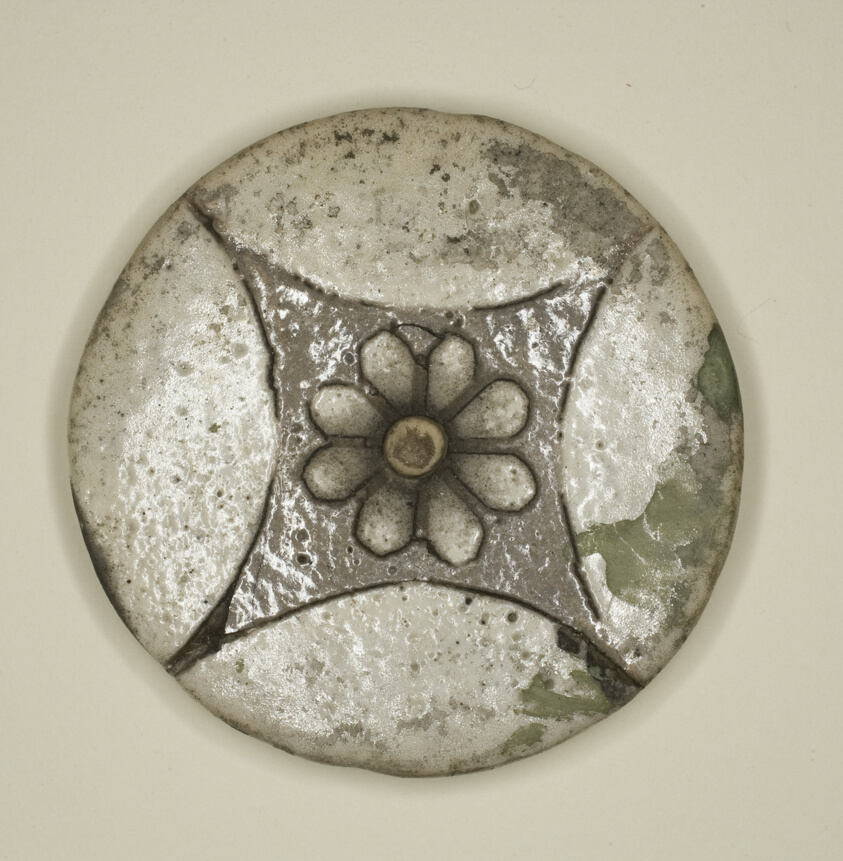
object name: Decorative Arts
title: Rosette from the Temple of Ramesses III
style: new kingdom, egyptian, ancient, ramesside period, twentieth dynasty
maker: Egyptian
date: New Kingdom, Dynasty 20 (about 1186–1069 BCE)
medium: Faience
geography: Egypt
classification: inlay; ceramics; ancient art; decorative arts; faïence (composite material)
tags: flowers